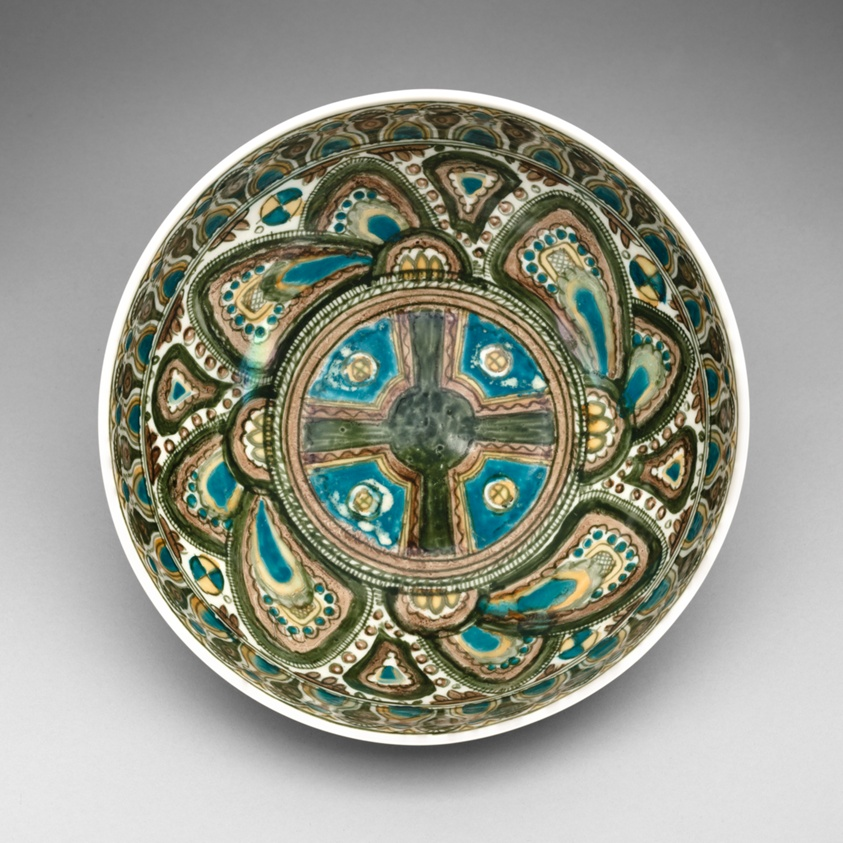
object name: Ceramics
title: Bowl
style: Modernism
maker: Designed by Edward Middleton Manigault (American, born Canada, 1887–1922); Manufactured by Lenox, Inc. (American, founded 1889); Trenton, New Jersey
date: 1917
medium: Porcelain with enamel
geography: Trenton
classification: decorative arts; american decorative arts; art of the americas; pottery; enamel; porcelain; bowl; ceramics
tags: dining, drinking